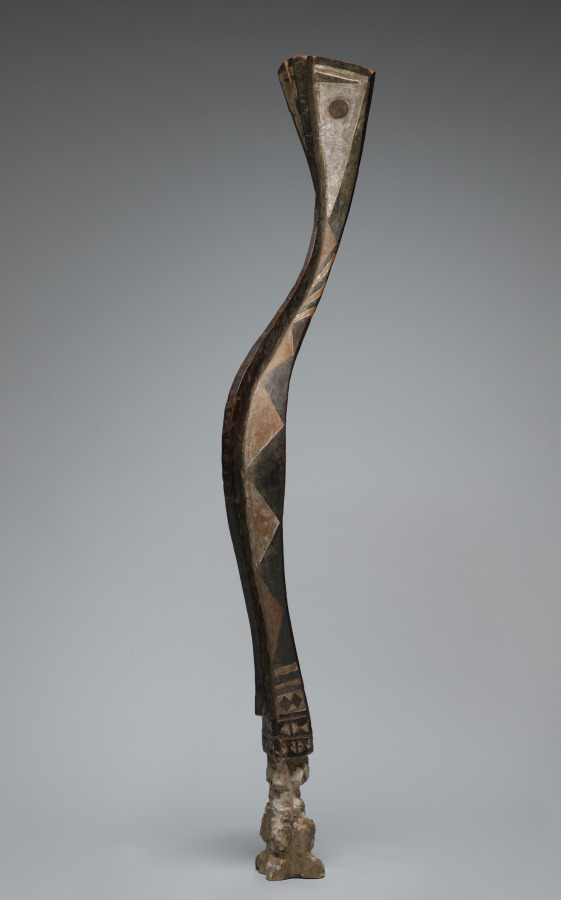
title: Serpent Headdress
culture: Africa, West Africa, Guinea, possibly Baga-style maker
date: late 1800s–early 1900s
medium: Wood (Nauclea pobeguinii) and paint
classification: Mask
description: Traditionally, Baga society was ruled by village councils of elders who derived their power from their direct contact with spirit entities through lifelong initiation rituals and the accumulation of secret knowledge. Two different religious orders controlled initiations, providing the context for much Baga art. One was identified as female, the other as male, though only men belonged to both groups. Initiations in each order followed three stages, culminating in the revelation of the highest spirit being. This type of Baga headdress embodied the serpent spirit Ninkinanka, honored for giving rain, bestowing riches, and bringing forth children. The serpent figure would be placed on top of a conical framework of palm branches carried on a male dancer’s head. It appeared at the end of the first level of the initiation for boys and girls or just before the circumcision at the beginning of the boys’ initiation.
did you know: In the context of boys' initiations, the serpent headdress was sometimes identified as the rainbow, which the Baga and their neighbors associate with beginnings and endings, life and death, and the continuation of lineages.